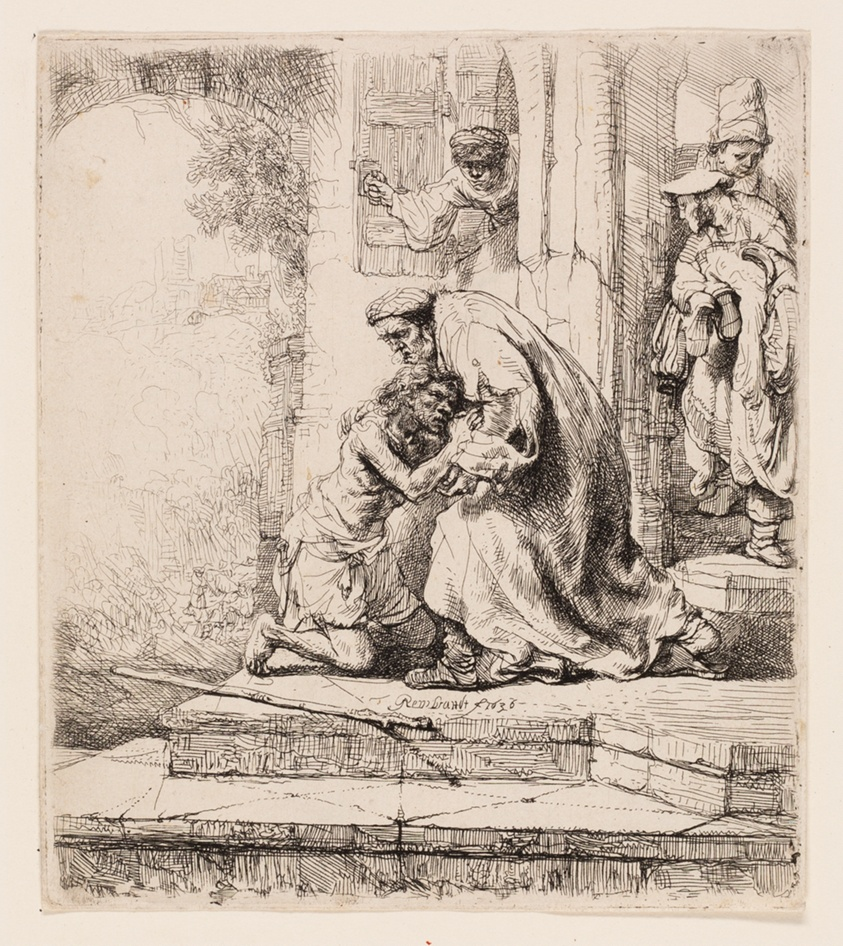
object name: Print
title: The Return of the Prodigal Son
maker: Rembrandt van Rijn (Dutch, 1606-1669)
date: 1636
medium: Etching on ivory laid paper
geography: Holland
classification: etching; print; prints and drawing; paper